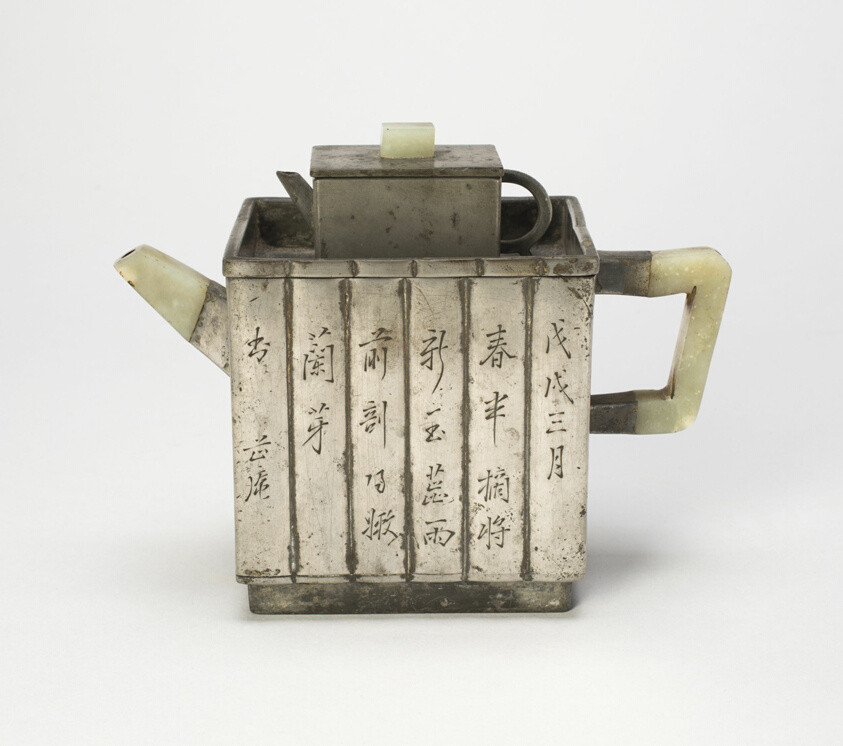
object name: Vessel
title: Heater for Rice Wine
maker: China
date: Ming dynasty (1368–1644)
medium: Pewter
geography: China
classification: pewter; metalwork; asian art